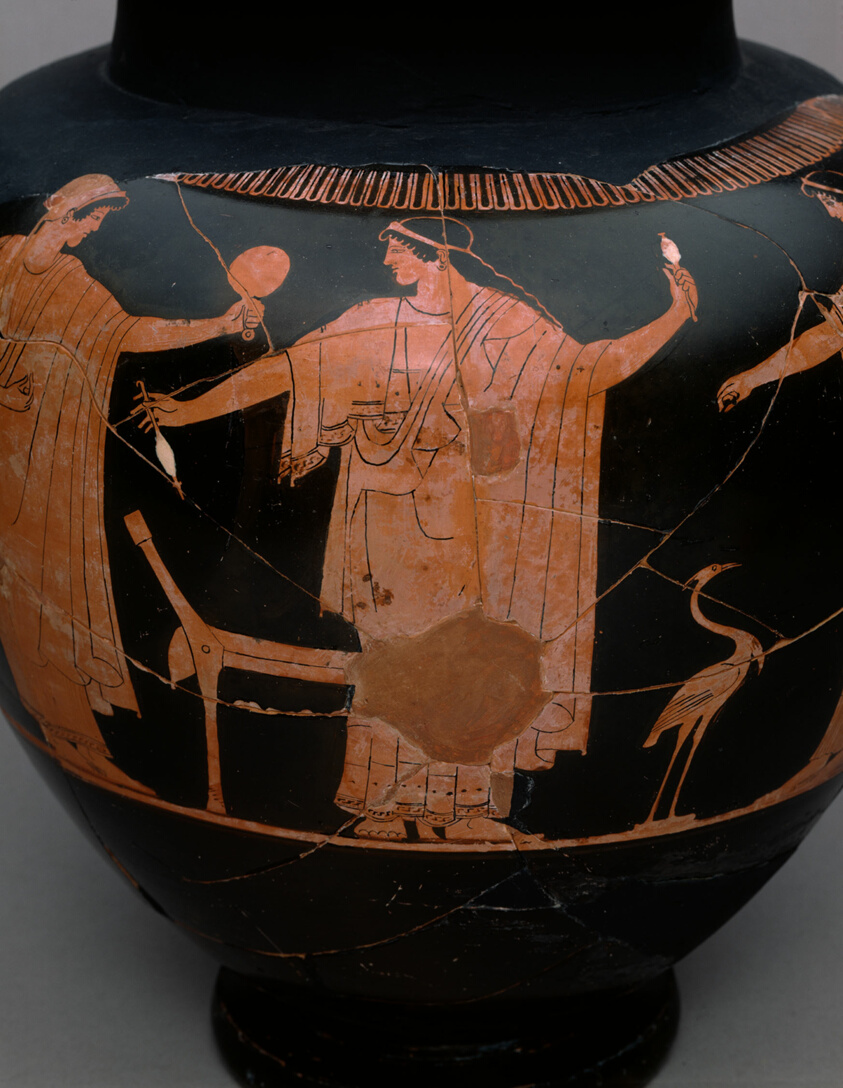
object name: Vessel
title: Stamnos (Mixing Jar)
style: attic, red-figure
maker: Attributed to Syriskos (formerly the Copenhagen Painter); Greek; Athens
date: 480-470 BCE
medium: terracotta, red-figure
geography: Athens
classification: vessel; ceramics; ancient art